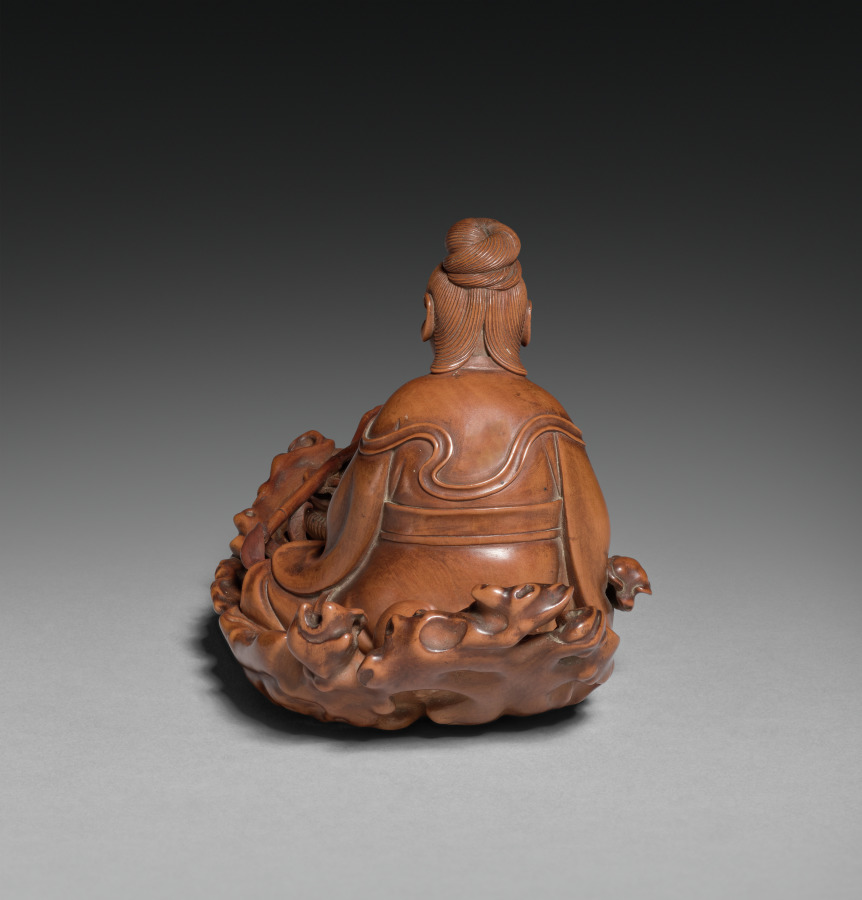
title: Figure of Daoist Immortal He Xiangu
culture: China, Qing dynasty (1644-1911)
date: 1700s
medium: Boxwood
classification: Wood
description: He Xiangu is one of the Eight Immortals in the Daoist pantheon. She was thought to have been a real person who lived in the Tang dynasty, originally named He Qiong. As a teenager, she was instructed in a dream to eat powdered mica to become immune from death and to vow to remain unmarried. She did so and became an enlightened practitioner of Daoism. In this delicate carving, He Xiangu is placidly seated in a gnarled and knotty wooden raft amid green-tinted ivory waves. In front of her rests a bamboo basket filled with objects associated with Daoist immortality, and she holds a branch of lingzhi fungus like an oar.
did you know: The lingzhi she holds is a woody mushroom often used in traditional Chinese medicine and associated with immortality.